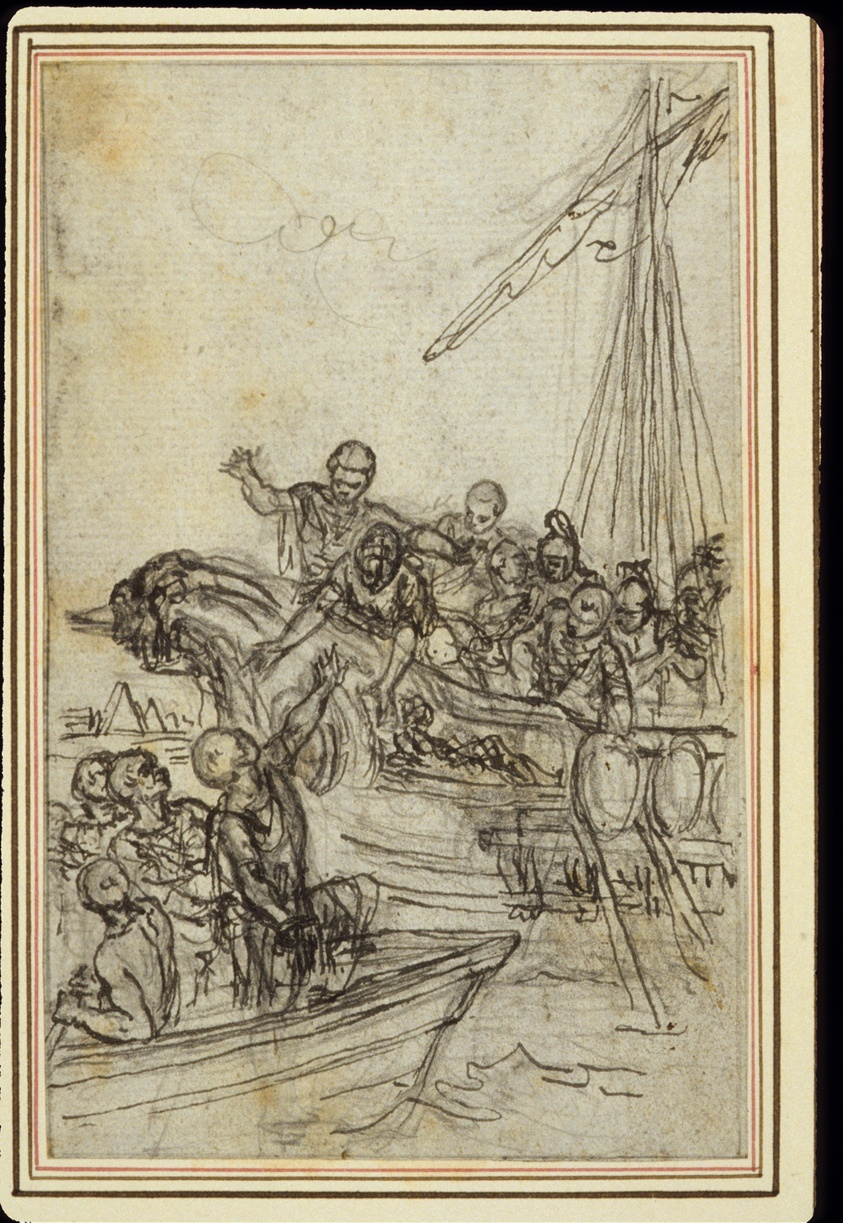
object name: Drawing and Watercolor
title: Study for Lucain's "La Pharsale", Canto VIII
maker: Hubert François Gravelot (French, 1699-1773)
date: c. 1766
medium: Pen and black ink, over graphite, on gray laid paper, incised for transfer, and perimeter mounted on cream laid paper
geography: France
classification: pen and ink drawings; drawings (visual works); prints and drawing